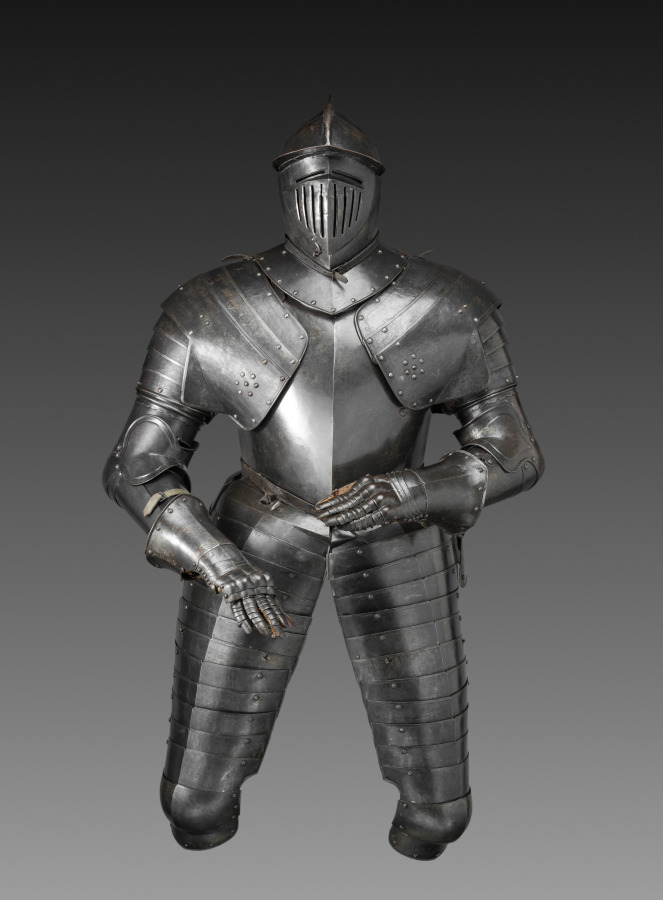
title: Cuirassier's Armor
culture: Austria, Graz(?), early 17th century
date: c. 1600–20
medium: steel (originally blued, now black); leather straps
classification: Arms and Armor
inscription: Proof mark (musket shot) is located on the proper left side of the breastplate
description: The cuirassier was the heavy cavalryman of the late 1500s and early 1600s. Carrying pistols and a sword, he was clad in full armor, like this suit, with the exception of his lower legs, which were protected by heavy riding boots. Shortly after 1650, such heavy cavalry armor disappeared from use. By then, European cavalries had abandoned full armor as impractical against the increased sophistication of firearms. Similar armors survive in the Armory of Graz, Austria.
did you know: This suit of armor is just over 5 1/2 feet tall.